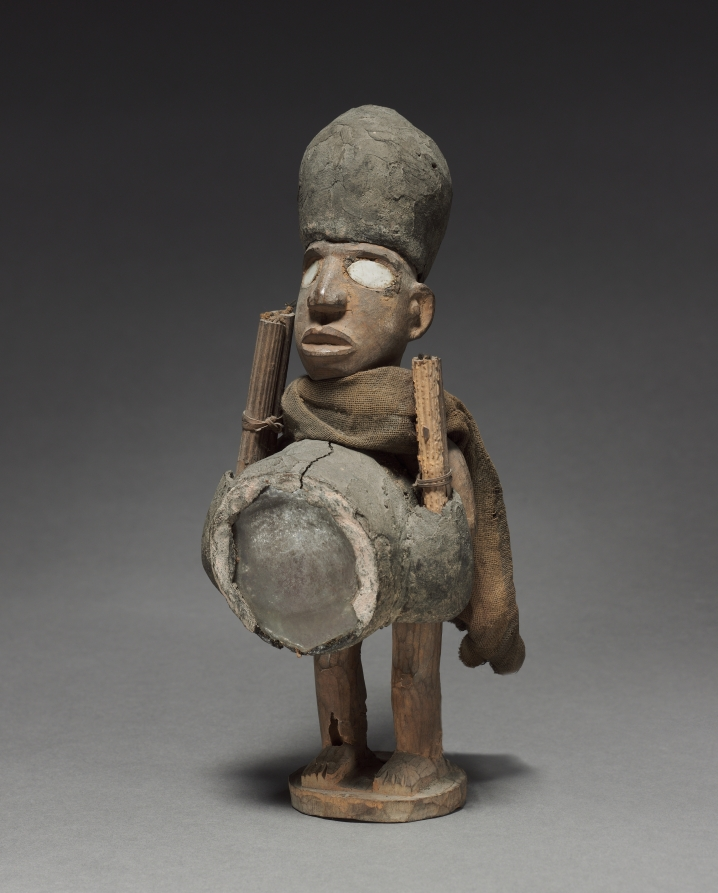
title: Power figure (nkisi)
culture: Africa, Central Africa, Republic of the Congo, Kongo-style maker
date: late 1800s–early 1900s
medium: Wood, organic materials (including resin), cloth, metalized glass, possibly porcelain, and plant fiber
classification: Sculpture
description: This figure is one of the two tallest of the seven anthropomorphic minkisi figurines previously in the Delenne collection. Identified as an nduda, two upward “guns” are attached on its side loaded with gunpowder used to shoot witches. Its label bears the word colique, a term referring to heavy pains caused by intestinal obstruction.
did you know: The object’s two small guns are pointing upward, but bears the label “colique,” a term referring to heavy pains caused by intestinal obstruction.